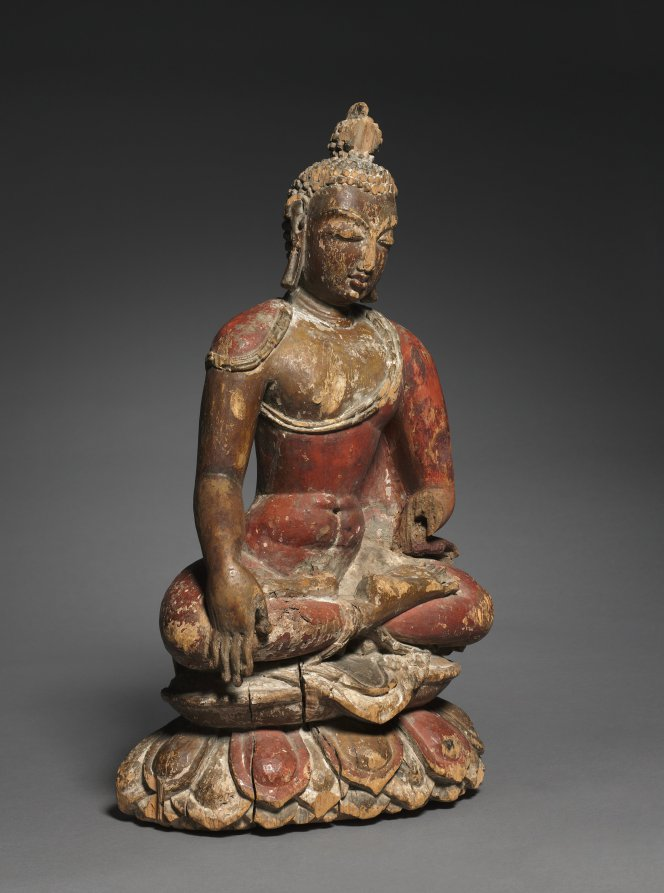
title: Seated Buddha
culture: Western Himalayas, possibly Ladakh or Lahul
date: 1000s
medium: painted wood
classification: Sculpture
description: Eleventh-century western Tibet experienced a period of fervent reconstruction of Buddhist monasteries following the persecution of Buddhism during the 9th and 10th centuries. Art from Kashmir was avidly collected and copied as part of those reconstruction efforts. Kashmiri stylistic traits, such as the pinched waist and abdominal musculature seen in this rare wooden image, are from that critical time. The pioneering Italian Tibetologists Giusseppe Tucci and Egenio Ghersi discovered this sculpture during an expedition to Tibet from 1933 to 1935